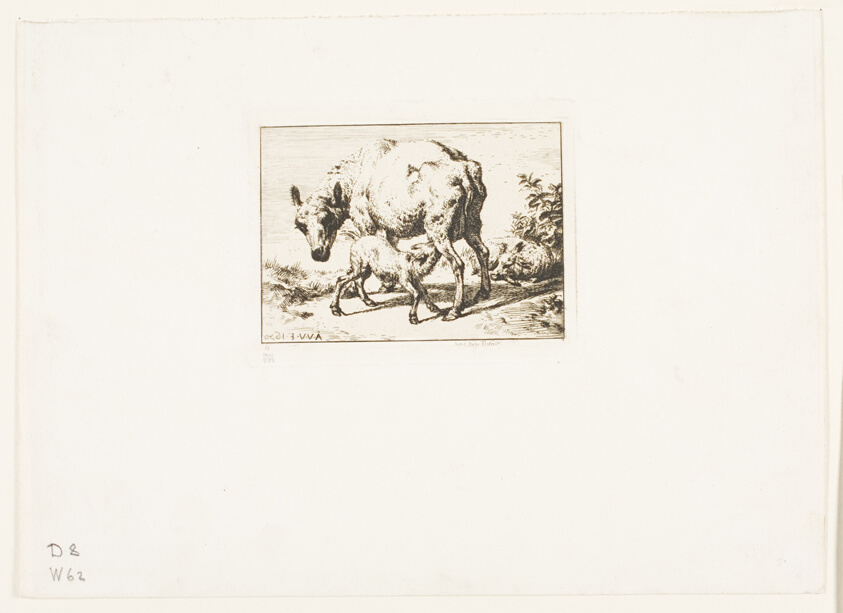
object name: Print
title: The Ewe with Two Lambs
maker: Charles Meryon (French, 1821-1868); after Adriaen van de Velde (Dutch, 1636-1672)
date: 1850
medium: Etching and engraving on ivory wove paper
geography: France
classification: etching; print; prints and drawing